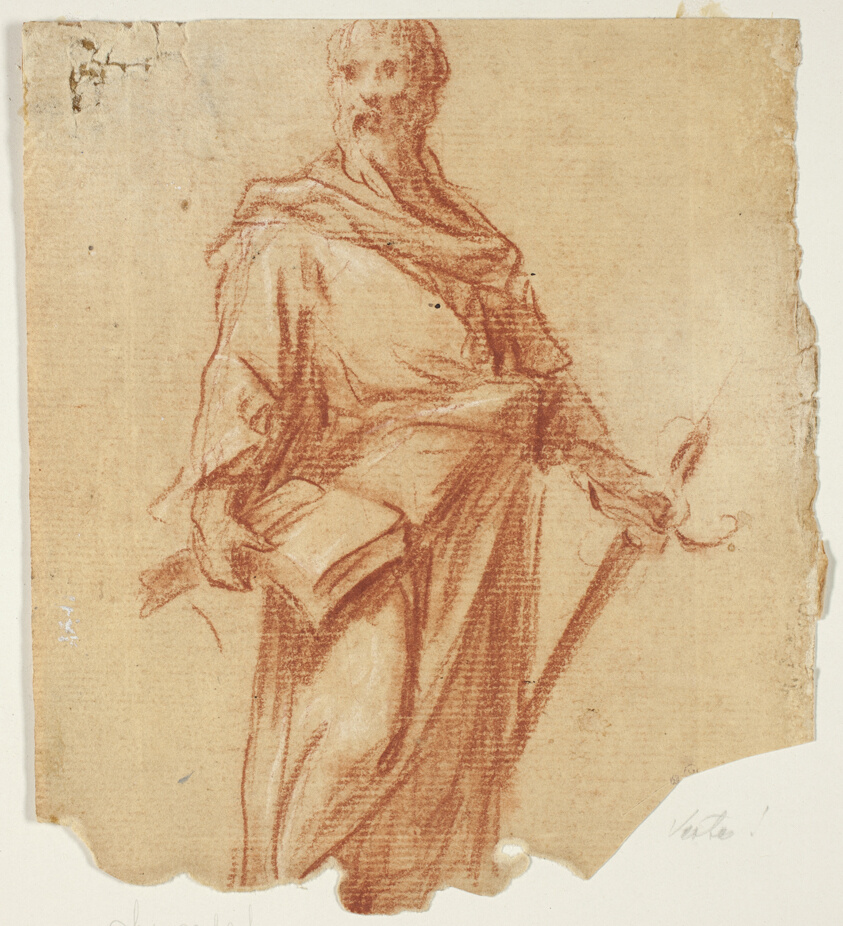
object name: Drawing and Watercolor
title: Apostle (recto); Standing Female Figure (verso)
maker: Circle of Carlo Maratti (Italian, 1625-1713)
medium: Red chalk, heightened with touches of white chalk (recto), and red chalk (verso), on tan laid paper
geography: Italy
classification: chalk; drawings (visual works); prints and drawing